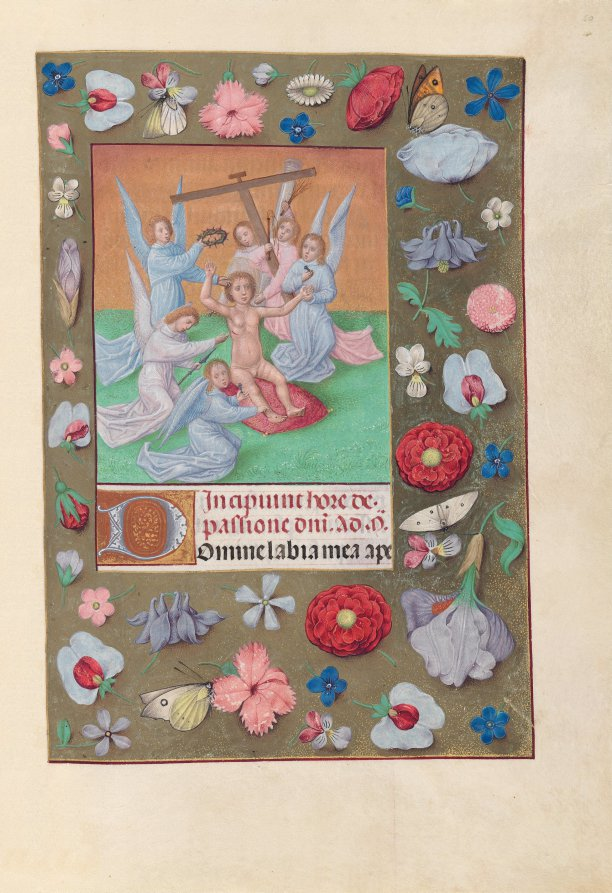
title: Hours of Queen Isabella the Catholic, Queen of Spain: Fol. 50r, Infant Christ with Instruments of the Passion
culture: Flanders, Ghent and Bruges, late 15th century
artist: Master of the First Prayerbook of Maximillian (Flemish, c. 1444–1519)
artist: and Associates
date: c. 1500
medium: ink, tempera, and gold on vellum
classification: Bound Volume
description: This manuscript was illuminated by a circle of at least five highly organized manuscript painters active in the Flemish cities of Ghent and Bruges. The principal illuminator was Alexander Bening, who painted the majority of the book's miniatures. Manuscripts produced by this circle of artists are renowned for the decoration of their borders, which typically feature a rich variety of realistically-painted flowers, birds, and butterflies. This prayer book, called a book of hours, was intended not for a cleric, but for the private devotions of a lay person-in this case, Isabella the Catholic, Queen of Spain (1451-1504). Isabella's coat of arms embellishes the book's frontispiece. It is unlikely that the book was commissioned by the Queen herself; rather, she probably received it as a diplomatic gift from someone courting her patronage, perhaps Cardinal Francisco Jimenez de Cisneros. A Franciscan friar, Jimenez was dependent upon Isabella for his advancement, first to the post of Queen's confessor in 1492, and then to Archbishop of Toledo in 1495.